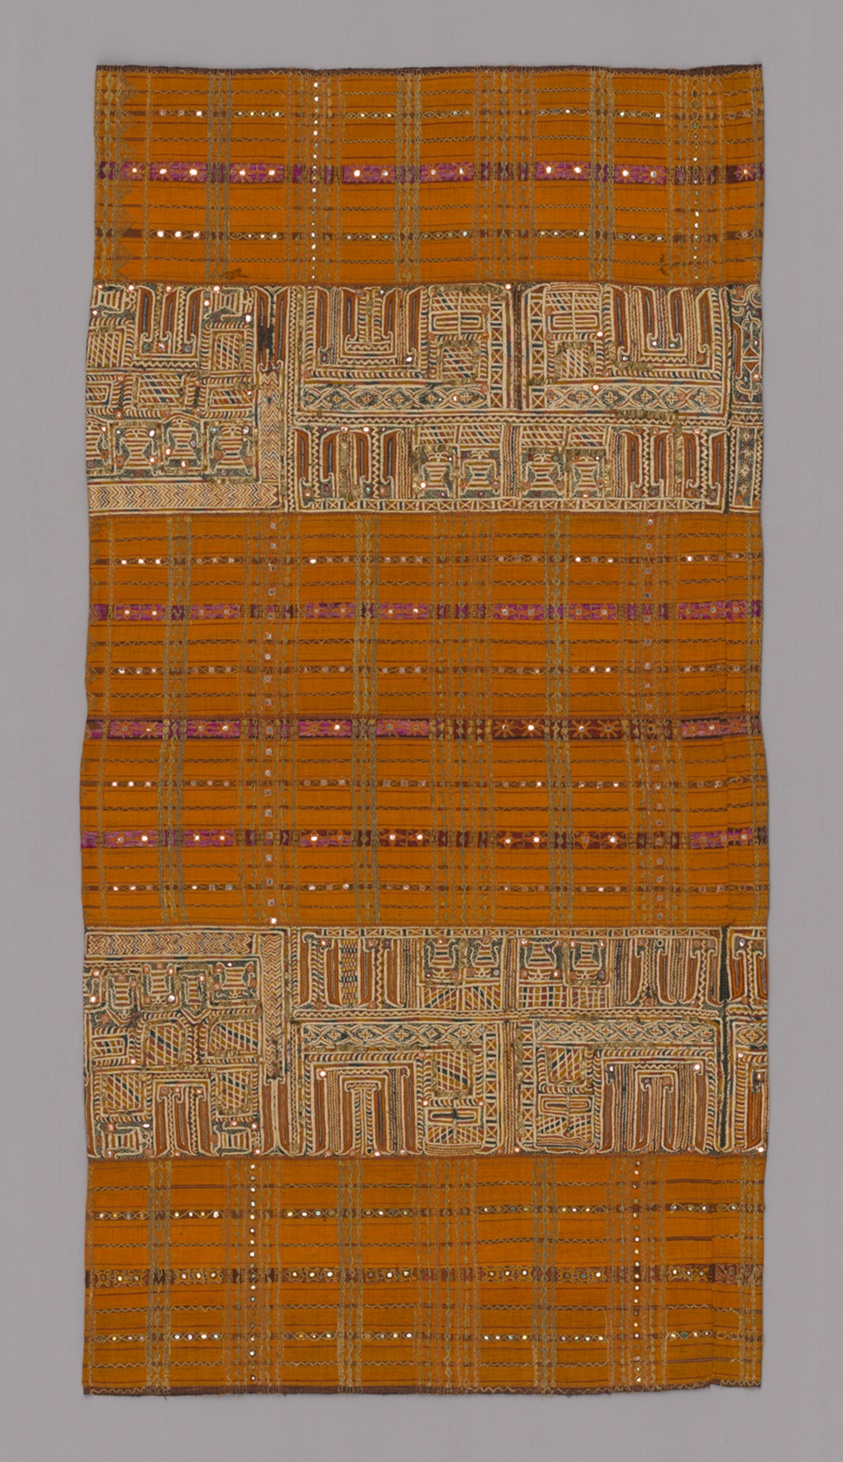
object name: Costume and Accessories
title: Woman's Ceremonial Skirt (tapis)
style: indonesian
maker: Paminggir (Indonesia, Sumatra, Lampung)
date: 19th century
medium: Six loom widths: four loom widths of: silk, cotton and silver-leaf-over-lacquered-paper-strip wrapped cotton, plain weave with supplementary patterning wefts; embroidered with silk, cotton and gold-leaf-over-lacquered-paper-strip wrapped cotton in back and straight stitches; laidwork and couching; embellished with metal-backed glass mirrors; and two loom widths of cotton, plain weave; embroidered with silk, cotton, gold leaf-over-lacquered-paper-strip wrapped cotton and gold-colored metal strip, in back, double running, split, stem, and surface satin stitches; laidwork and couching; embellished with metal-backed glass mirrors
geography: Sumatra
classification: textile; needlework (visual works); costume